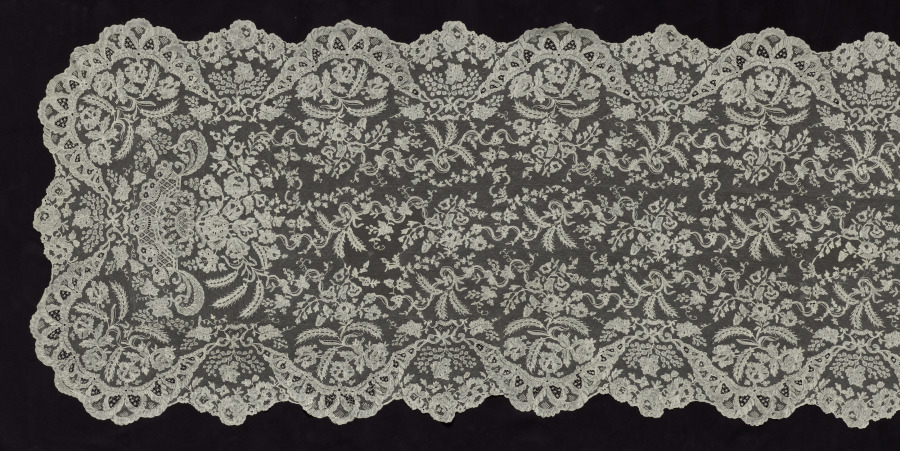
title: Lace Scarf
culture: France, Lille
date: late 1800s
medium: Linen: bobbin lace (blonde lace)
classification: Lace